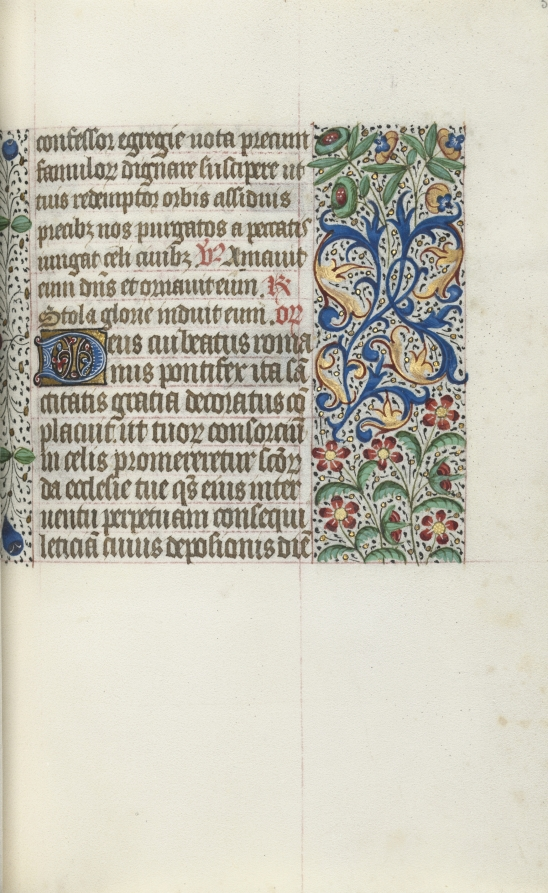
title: Book of Hours (Use of Rouen): fol. 53r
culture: France, Rouen, 15th century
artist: Master of the Geneva Latini (French, active Rouen, 1460–80)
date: c. 1470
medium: ink, tempera, and gold on vellum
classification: Bound Volume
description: In the late 1400s and early 1500s Rouen was an established and important center of book production. The city’s cathedral had a wealthy chapter that spent large sums of money to commission books and to maintain its extensive library. The stationers and booksellers would have likely been concentrated in or near the cathedral precinct. This artist, named after a manuscript now in Geneva, was Rouen’s principal illuminator during the second half of the 1400s.